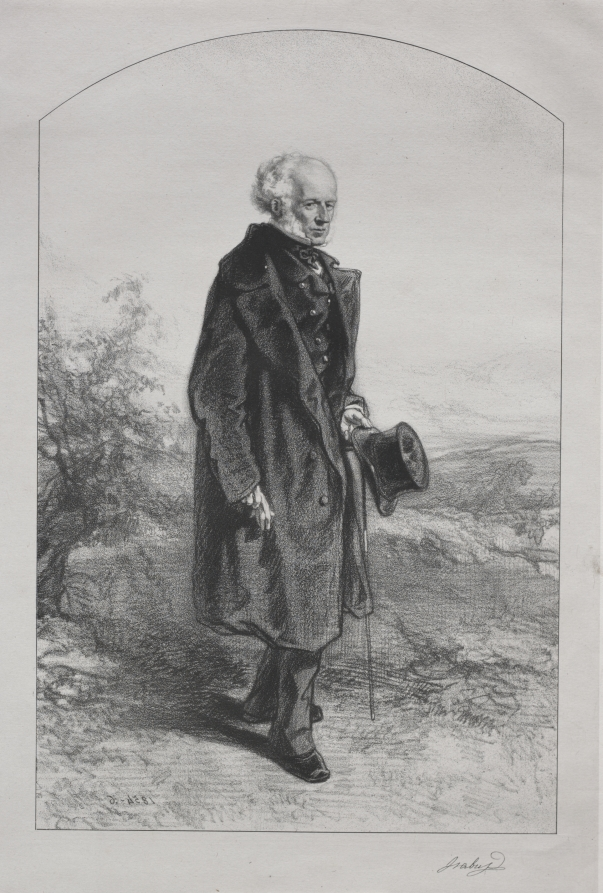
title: Isabey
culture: France, 19th century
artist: Paul Gavarni (French, 1804–1866)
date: 1854–1856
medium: lithograph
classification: Print